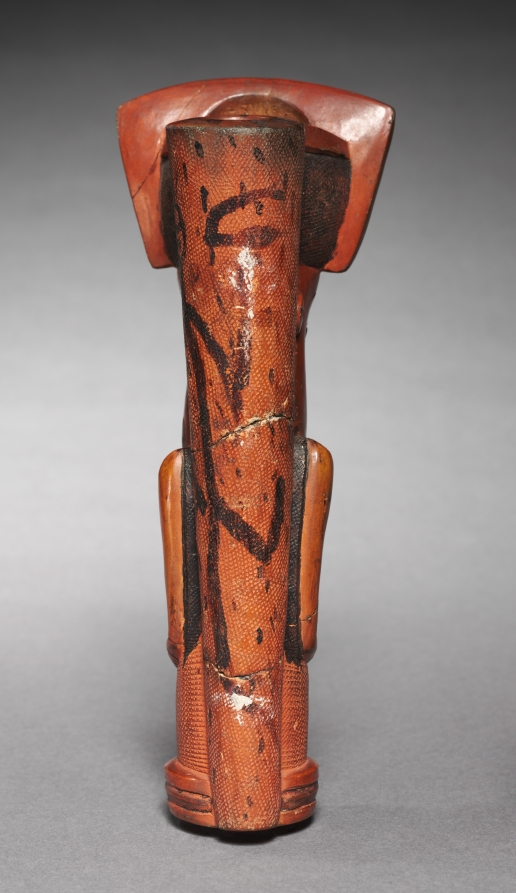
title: Pipe Bowl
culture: Equatorial Africa, Cameroon, Bali, 20th century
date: before 1935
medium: Ceramic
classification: Implements